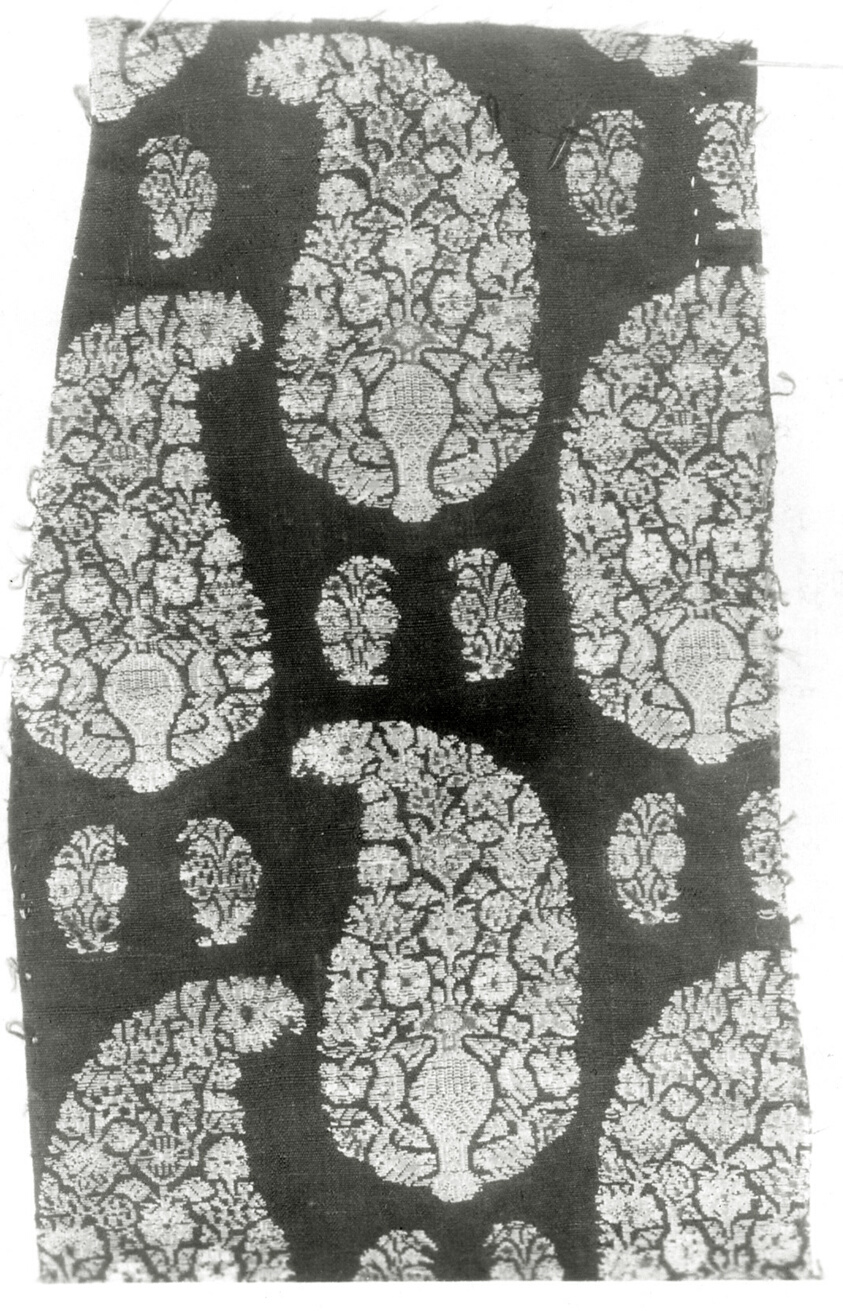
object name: Textile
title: Fragment (Dress Fabric)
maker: Iran (Persia, Abiana)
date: 19th century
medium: Brocaded plain cloth in silk and gold wound on an orange silk core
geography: Iran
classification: textile; weaving